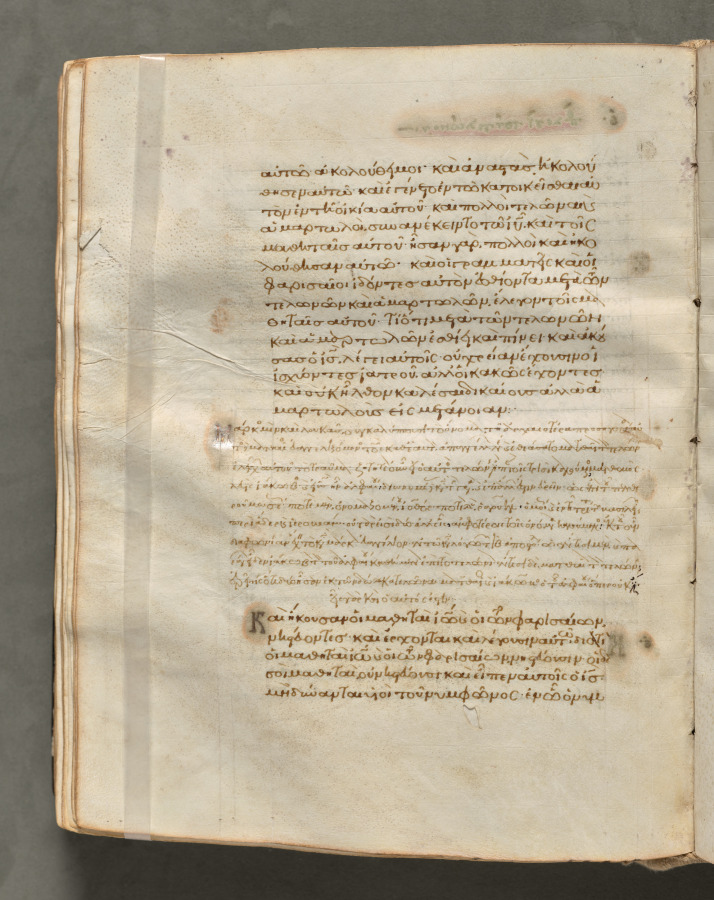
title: Text, folio 138 (verso), from a Gospel Book with Commentaries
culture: Byzantium, Constantinople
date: c. 1000–1100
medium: ink, tempera, and gold on vellum; leather binding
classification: Bound Volume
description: Each of the four gospels in this book opens on a page with brilliantly illuminated borders depicting the author of the text as well as birds-principally peacocks, symbols of the immortality of the soul-and fountains, representing the fountain of life and the salvation of the soul. This volume consists of 428 leaves with texts in Greek. Its level of sophistication suggests that it was probably written and decorated in a monastery in Constantinople.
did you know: Gospel Books were carried in procession through Byzantine churches.